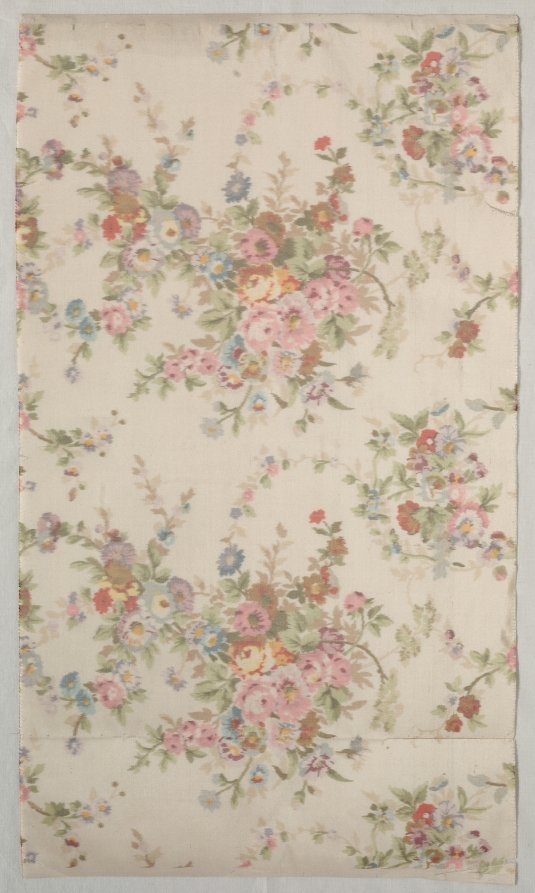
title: Printed Silk with Flower Design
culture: France, late 19th century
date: late 1800s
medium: roller printed silk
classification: Textile